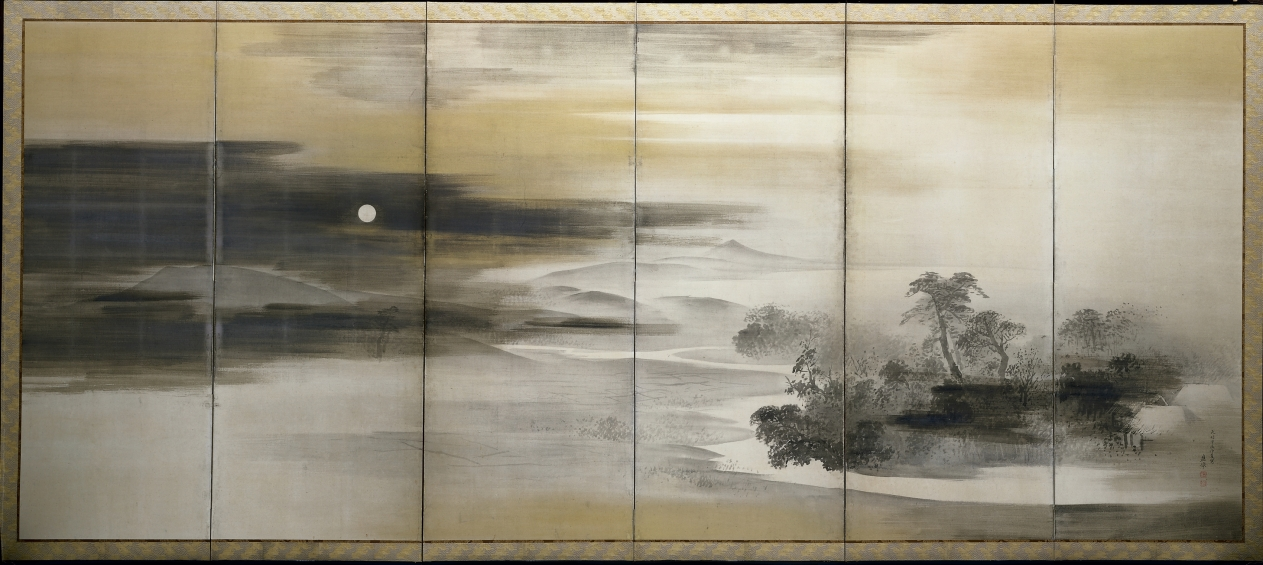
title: Summer Night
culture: Japan, Edo period (1615–1868)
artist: Maruyama Ōkyo (Japanese, 1733–1795)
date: 1784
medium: Six-panel folding screen, ink, gold, and silver on paper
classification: Painting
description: Ōkyo painted these panoramas in the summer of 1784. Regarded as Kyoto's most important painting teacher and accomplished artist, he had studied Western painting techniques, "realistic" sketching from nature, and traditional Japanese style painting (yamato-e). The naturalistic quality of these scenes results from a blend of detailed observation of nature and a remote, even detached regard for man's place in the world.